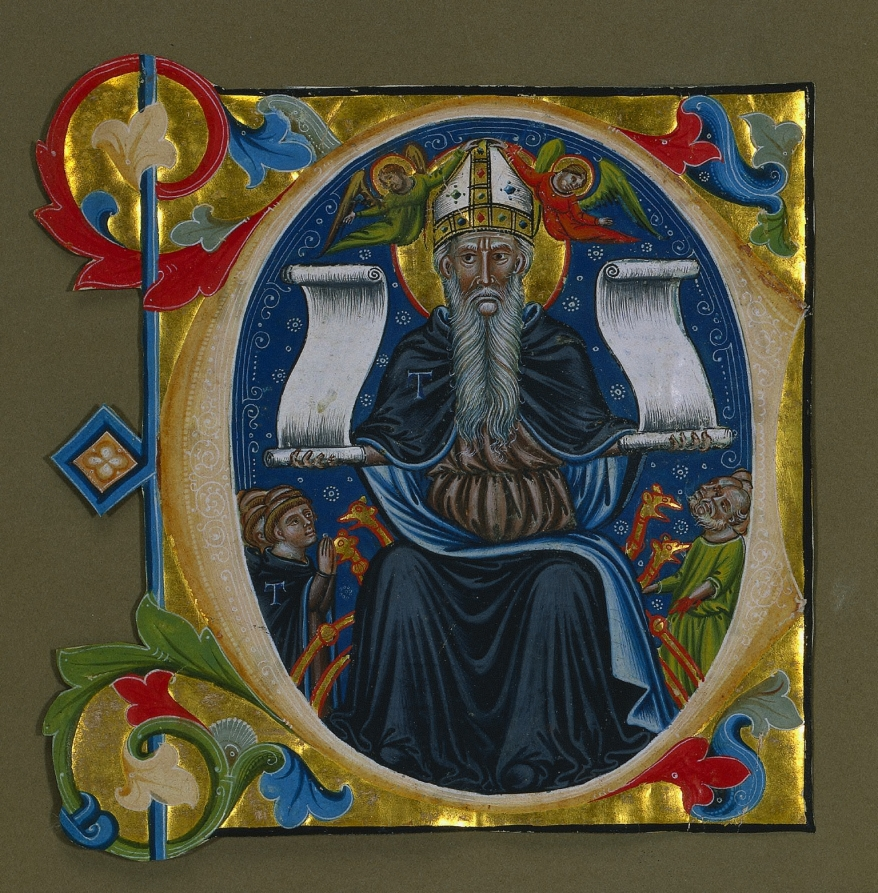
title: Initial C Excised from a Choral Book: St. Anthony with Antonite Friars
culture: Italy, Venice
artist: Giustino di Gherardino da Forlì (Italian, 1325–1425)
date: c. 1360–70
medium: ink, tempera, and gold on vellum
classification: Manuscript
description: The focus of this initial is an imposing portrait of Saint Anthony, one of the original Christian “desert hermits.” Anthony retired into the Egyptian desert where he remained in solitude for many years. He is generally regarded as the founder of monasticism and, along with Saints Jerome, Ambrose, and Gregory the Great, one of the four fathers of the Christian Church. Anthony is identified here by his monastic garb and by the tau (T-shaped Egyptian cross) on the shoulder of his cloak. The religious order bearing his name was founded in the 11th century, and numerous monasteries were founded in his honor. Members of this order are depicted in the lower left.